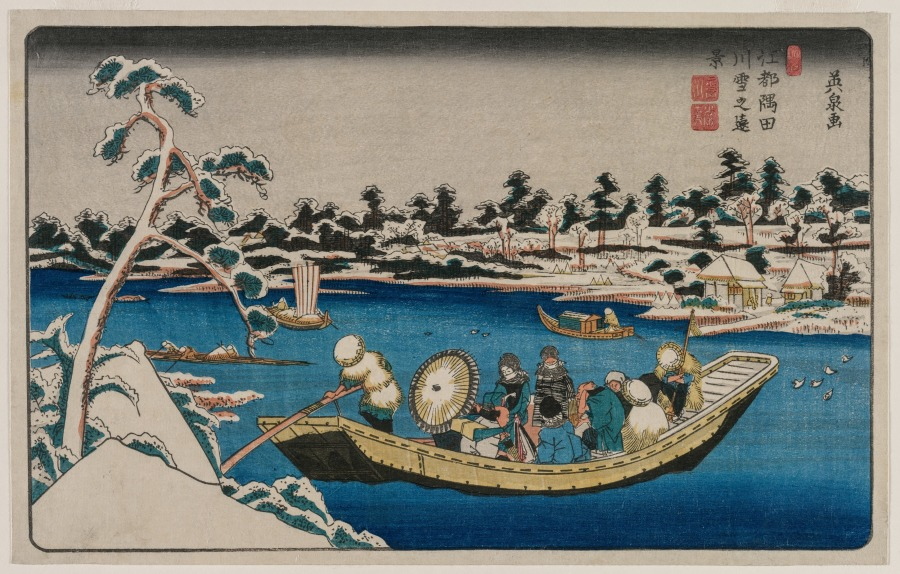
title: A Distant View of Snow on the Sumida River in Edo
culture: Japan, Edo period (1615–1868)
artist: Ikeda Eisen (Japanese, 1790–1848)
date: early 1830s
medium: color woodblock print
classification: Print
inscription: Signature: Eisen ga. Publisher: Kawaguchi Fukusendo han (seals before and after picture title).